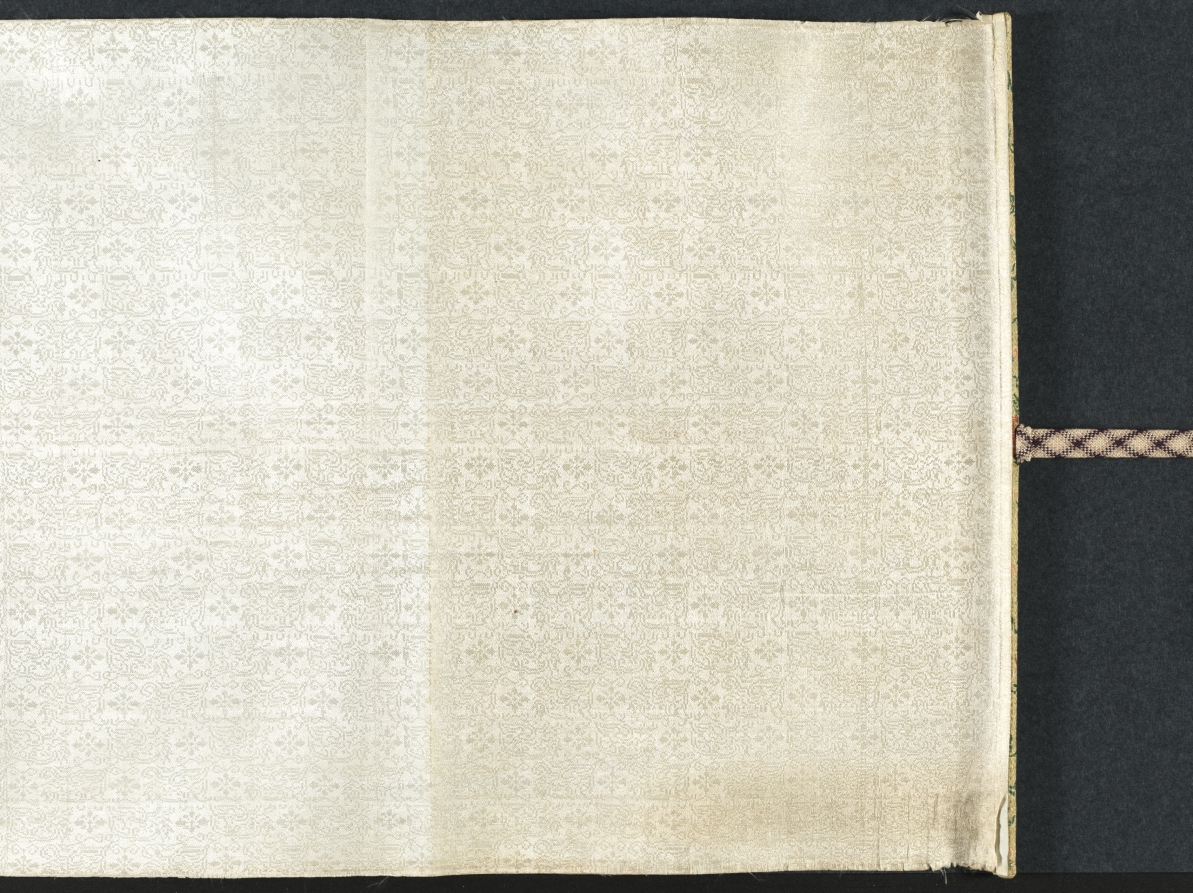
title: Ink Flowers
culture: China, Yuan dynasty (1271-1368)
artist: Zhao Zhong (Chinese, second half of the 1300s)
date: 1361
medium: Handscroll; ink on paper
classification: Painting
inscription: 寶帶同心結，香羅合歡扇。/ 繡作錦鴛鴦，雙雙為君獻。/ 薔薇露灑熏籠衣，馨香奉君君勿違。 原初并題。 [印] 趙衷原初畫記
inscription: 翠袂素羅韈，玉臺黃金盃。浩歌渡弱水。天風卷海三山開，麻姑方平為招飲，蛟宮獻舞銀濤堆。 原初并題。 [印] 雲林清趣、[印] 趙衷原初畫記。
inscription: 右用湯叔雅慶元中所寫墨花法作此卷，又效李長吉體賦詩以題之。詩與畫雖未工，要皆出於古人之餘，譬猶欲成方圓而必求其規矩之用也，識者毋誚焉！至正辛丑八月望日，東吳野人趙衷原初謹識。 [印] 趙原初、[印] 傳世清玩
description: Zhao Zhong's flowers, each paired with a poem, echo the fine-style colored flowers of the academic tradition, but instead he used only ink. Fine lines define the contours of each plant, as well as the veins within each petal and leaf. Careful ink washes give subtle modeling to the forms. The combination of lily, narcissus, and peony is unusual as the three belong to no known seasonal or symbolic system popular in the fourteenth century. Zhao’s medical training may have influenced the selection. Powdered lilies, for example, were prescribed to dispel grief, while the bark of tree peony roots was used as a treatment for various blood disorders.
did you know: This handscroll is a very rare example of ink flowers in the linear baimiao style of the fourteenth century.